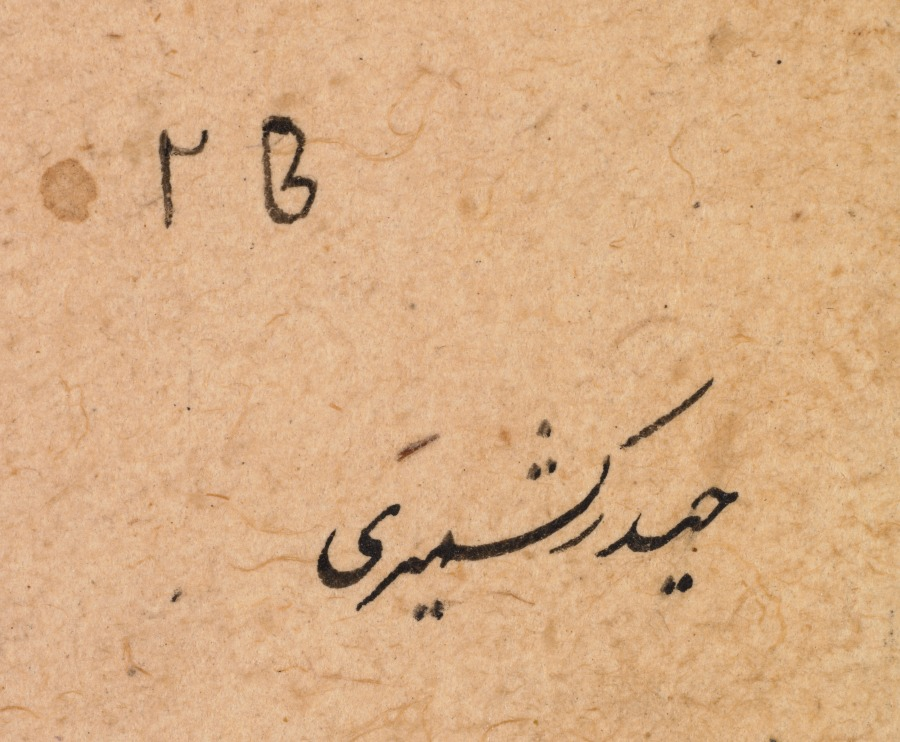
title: Isfandiyar slays Arjasp, the king of Turan, from a Shah-nama (Book of Kings) of Firdausi (Persian, about 934–1020)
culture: Mughal India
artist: Haidar Kashmiri (Indian, active late 1500s-early 1600s)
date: 1600–1605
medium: Gum tempera, ink, and gold on paper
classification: Painting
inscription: Persian inscription in left margin, in nasta‘liq script: 25 / Haidar Kashmiri; Persian title in nasta‘liq script: The Battle of Isfandiyar with Arjasp and The killing of Arjasp by the hand of Isfandiyar; Persian text in nasta‘liq script: He uttered these words, and hurried away from them Toward Arjasp’s court, bent on revenge He went forth, grasping a blade of Indian steel, Whomever of the notables his eyes fell on, was killed on the way So that in passing through the royal hall Hard it was to pick one’s way: So many wounded, battered, and dead Had turned the ground into a turbulent sea. When Arjasp awoke from his sleep His heart was troubled on hearing the din That he could not make out in the bedchamber. He put on his mail shirt and Roman-fashioned helmet Clutching in hand a burnished dagger, He shouted loud, blood coursing through his heart. The warrior Isfandiyar confronted him. They fought beyond measure and scale, Exchanging daggers and swords in a furious feud At times targeting the head, at times the waist, To him he (Isfandiyar) said, “Now from the tradesman Will you receive the gift of a blade, one glittering like a silver denarius. I have it as a gift for you, worthy enough to come from Luhrasp, inlaid with Gushtasp’s seal. He made Arjasp go limp and lifeless by the delivered cuts Nowhere on his body did he leave untouched. His mammoth body toppled over His head severed from the body by Isfandiyar. Such is the conduct of the revolving fortune: At times it offers us a honeyed potion, at others a deadly poison Why tie your heart to this transient place Since you know that you will not stay forever, do not grieve and pine. Having dealt with Arjasp, Isfandiyar Gutted the palace, its smoke reaching as far as Saturn He ordered torches lit Setting fire to the palace from all sides He entrusted his (Arjasp’s) women’s quarters to a eunuch, Taking all luster away from the place. He sealed off the treasury No one in Turan was now equal to his fight. He went to the stables and mounted A blade of Indian steel in his hand He selected among the Arab horses there And ordered them saddled A hundred and sixty men rode away from there Handpicked riders for the day of battle.; Verso: Text of Isfandiyar slays Arjasp, the king of Turan: Persian inscription in bottom margin, in nasta‘liq script: The army realized Persian text in nasta‘liq script: [cont. from recto] He furnished mounts, moreover, for his sisters, And marched forth from the court-gate of Arjasp, But left a few Iranians, men of name, With noble Sawa in the hold. “When we,” He said, “have gone outside the walls, I and my noble warriors, to the plain, Secure the gate against the Turkman troops, And may my good star aid me. When ye think That I have joined our noble troops outside, Then—let the watchmen from the lookout cry: ‘Blessed be the head and crown of Shah Gushtasp.’ And when the Turkman troops come toward the hold, In flight retreating from the battlefield, Then you shall throw the head of King Arjasp Before them from the tower of the watch.” The valiant hero rushed upon the plain, And slaughtered all the Turkmans that he found. As he approached the troops of Bishutan They saw and praised him in amazement that he, Who was so young, should show such bravery. When the moon had left her silver throne, And when three watches of the night had passed, The watchman shouted lustily, proclaiming: “Gushtasp, the Shah, has gained the victory, And may Isfandiyar be ever young. May heaven, moon, and fortune be his helpers, Who has in vengeance for Luhrasp beheaded Arjasp and, adding luster to our Grace And customs, cast him down from throne to dust, And made the name and fortune of Gushtasp Resplendent.” Hearing such a cry the Turkmans All listened while Kuhram grew dark of heart By reason of that watchman, was astonished, And spoke thus to Andariman: “How clear This cry is in the night! What do you say Can be the cause? Let us consult, for who Would dare to bawl thus by the monarch’s couch And after dark? What tricks might such a one Play in the day of battle, and thus bring Our nobles into straits! So send and have His head cut off, whoever he may be. If one of our own household is our foe, And he is backing up our enemies. “With evil words and evil presages, Then will we brain him with an evil mace.” Now when the cry went on persistently Kuhram was stricken to the heart with anger Against the watchman whose utterance, spread abroad In such a fashion, filled the nobles’ ears. The soldiers said: “The shouts increase, beyond A watchman’s! Let us drive the foemen forth And after take this host” Kuhram, who was straitened At heart about that watchman, writhed and frowned. He told the troops: “These men have filled my heart With dread about the king. We must return At once, past question. What may happen after I know not.” So that night they left the field, Where Isfandiyar, with ox-head mace And wearing mail, pursued them. When Kuhram had reached The portal of the hold, and saw the Iranians Pursuing, “What is left us,” he exclaimed: “But to fight with brave Isfandiyar? Unsheathe and send your message by the sword.” But fortune frowned and those famed chiefs fared ill. The two hosts raged and smote each other's heads Till morning came, and then the chiefs of Chin Had had their day. Ascending to the ramparts The warriors of Isfandiyar inside The hold flung down therefrom the severed head Of brave Arjasp—the king that had slain Luhrasp. The Turkmans fought no longer; from their host Arose a cry, and all the troops unhelmed. The two sons of Arjasp wept and were consumed As in a fierce fire, while all the army knew What they must weep for on that evil day. (closely adapted from Warner and Warner 1912, 152)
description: This illustrated scene occurs early in the narrative of Isfandiyar, who is destined to serve as king of Iran with Rustam as his champion. The episode describes Isfandiyar’s quest for vengeance against the tyrant Arjasp of Turan, who had defeated his father in battle and taken his sisters captive. Isfandiyar disguised himself as a merchant, entered Arjasp’s fort, and then fought his way to the enemy king, whom he defeated in battle. The artist has included beautiful and delicate details of the garden and architectural setting of this gruesome scene. An onlooker below puts his finger to his mouth in a gesture of astonishment.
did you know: Wine spilling from a porcelain bottle heightens the action of the moment.